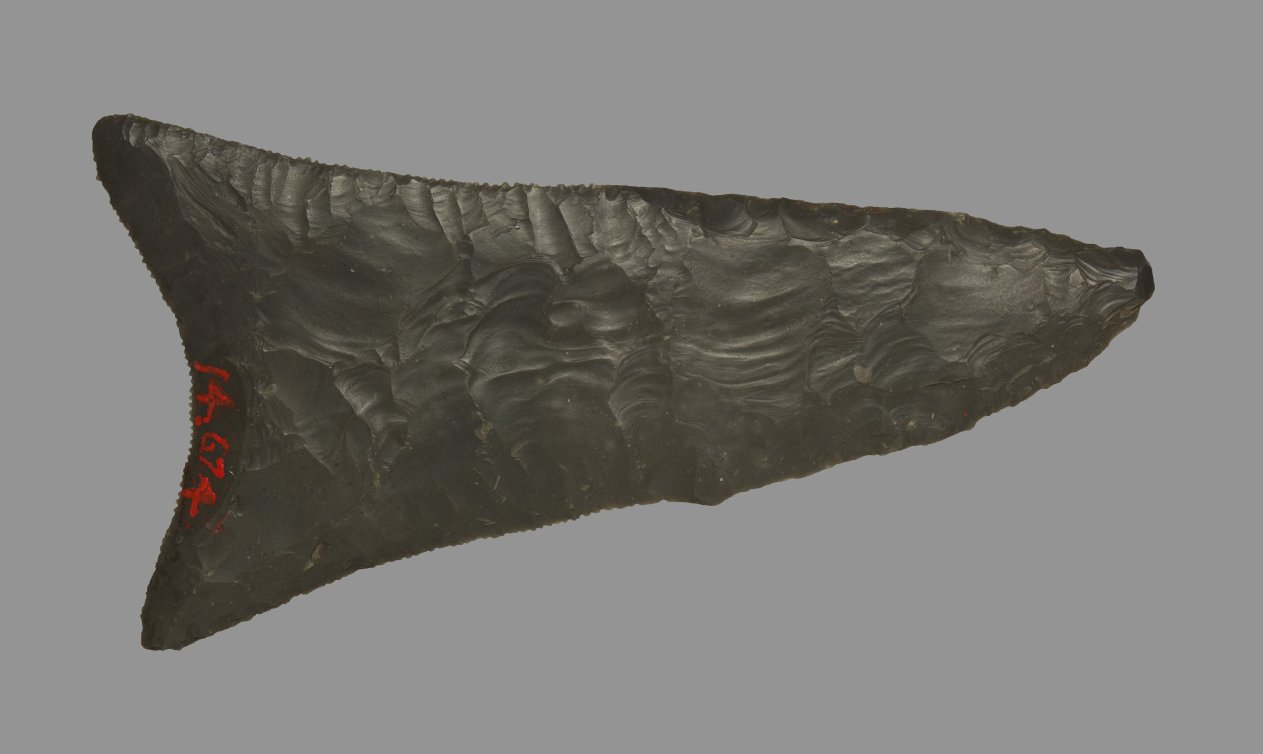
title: Fishtail Knife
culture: Egypt, Predynastic (5000–2950 BCE), Naqada Ia–IIa (3900–3300 BCE)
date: 4500–4000 BCE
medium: dark brown to a dark green colored flint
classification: Implements